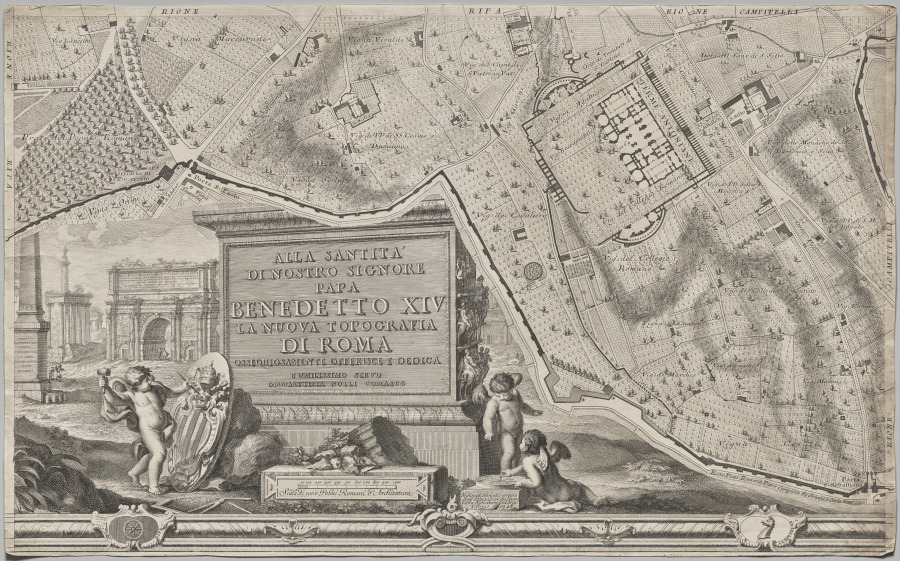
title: Nuova pianta di Roma data in luce da Giambattista Nolli l’anno MDCCXLVII, known as La Pianta Grande di Roma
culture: Italy, 18th century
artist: Giovanni Battista Nolli (Italian, 1701–1756)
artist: Carlo Nolli (Italian, 1690–1790)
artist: Rocco Pozzi (Italian, 1701–1774)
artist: Pietro Campana de Soriano (Italian, 1725–c. 1779)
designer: Stefano Pozzi (Italian, 1699–1768)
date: 1748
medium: etching and engraving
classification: Print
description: The monumental Pianta Grande di Roma, or Large Plan of Rome, which measures about 5 x 7 feet when its twelve plates are assembled, is a landmark in both cartography and printmaking. The map is considered the first scientific rendering of Rome, establishing new standards of accuracy and thoroughness when it was published in 1748. Devised by the Lombard architect and surveyor Giovanni Battista Nolli (Italian, 1701-56), the creation of the map required over ten years of surveying the city carried out by Nolli and a team of assistants with the help of new measuring devices. In Nolli’s “ichnographic” (also called “ground”) plan, architectural features and the urban infrastructure are reduced to a single horizontal slice, a minutely detailed footprint that conveys dimensions, proportions, and orientations to scale with the utmost clarity.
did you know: To make this map, Pope Clement XII granted the mapmaker permission to measure courtyards and other interior, inaccessible spaces in monastic communities, even those in nuns’ convents, which was controversial at the time.